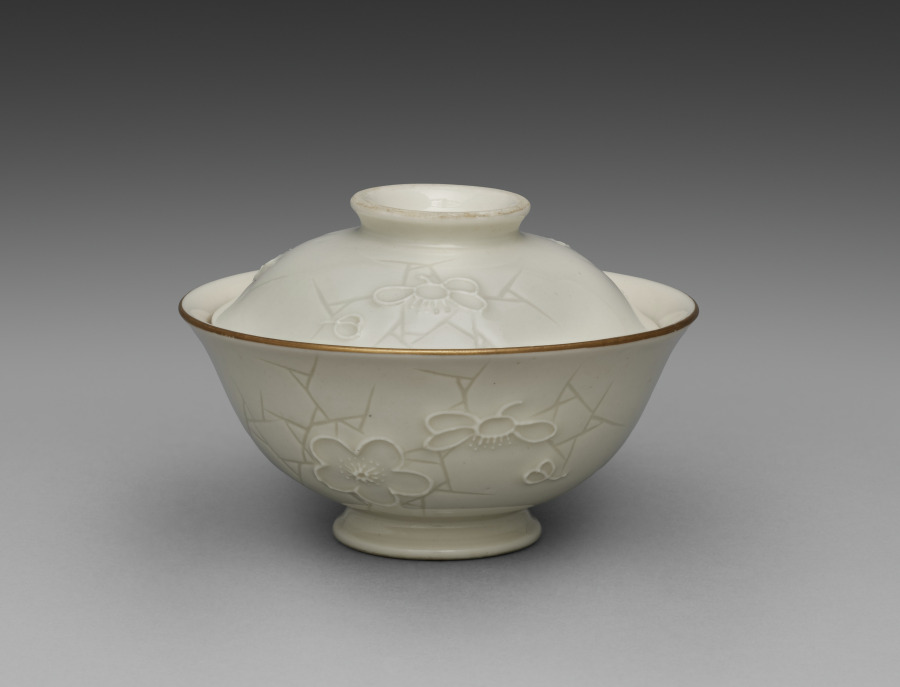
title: Covered Bowl from Dining Set with Plum Blossoms and Cracked-Ice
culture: Japan, Meiji period (1868–1912)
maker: Seifū Yohei II (Japanese, 1844–1878)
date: c. 1875–78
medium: Porcelain with molded designs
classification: Ceramic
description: Each item in this set has a delicate low-relief design of flowering plum branches over scattered, intersecting lines meant to resemble the cracked-ice surface of a frozen body of water and is signed on the base in gold pigment. While Yohei II produced many fine works in underglaze blue, like those produced by Kiyomizu Shichibei, he also made works in quite different styles later in his career, from the early 1870 s. In 1873, he was appointed purveyor to the Industrial Center of Kyoto Prefecture, a designation associated with Kyoto’s efforts to reach an international market through the port of Kobe; and from 1875 until his death, he was involved in national-level projects to present Japanese ceramics across the world. It was during this period that Yohei III was apprenticed to Yohei II, and it has been suggested that this set may in fact be an early example of Yohei III’s work, which he signed with his teacher’s name. Decorated with flowers resembling Japanese textile motifs, the set calls to mind the design of Yohei II’s pair of vases with plum blossoms in the Victoria and Albert Museum. Here, the elaborate trees created for a formal public exhibition setting have been translated into the approachable blossoms of the genteel domestic environment. While the designs are consistent across the pieces, each raised flower petal and pistil and each incised line in the ice was done by hand, so the cups, bowls, and dishes are similar yet unique. The bottoms of two boxes once identified the set’s owner, but the information has been deliberately obscured with black ink. However, inscriptions still visible appear to indicate two occasions, once at the end of July 1886 , and once again in June 1916 , when parts of the set were requested from Hokura in Niigata Prefecture. The location corresponds to a neighborhood in the present-day city of Jōetsu. The surname Tsuji 辻 also appears on a paper tag affixed to one of the box cloths. Future research may possibly reveal more about their provenance. A vase by Yohei III in a private collection combines the formal grandeur of the Yohei II vases in the Victoria and Albert Museum with the gentler design of this dining set, placing flowering plum trees against soft, scalloped-edge clouds resembling those in golden screens.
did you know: The dining wares have a creamy white coloration that the four boxes containing them identify as Korean in style.